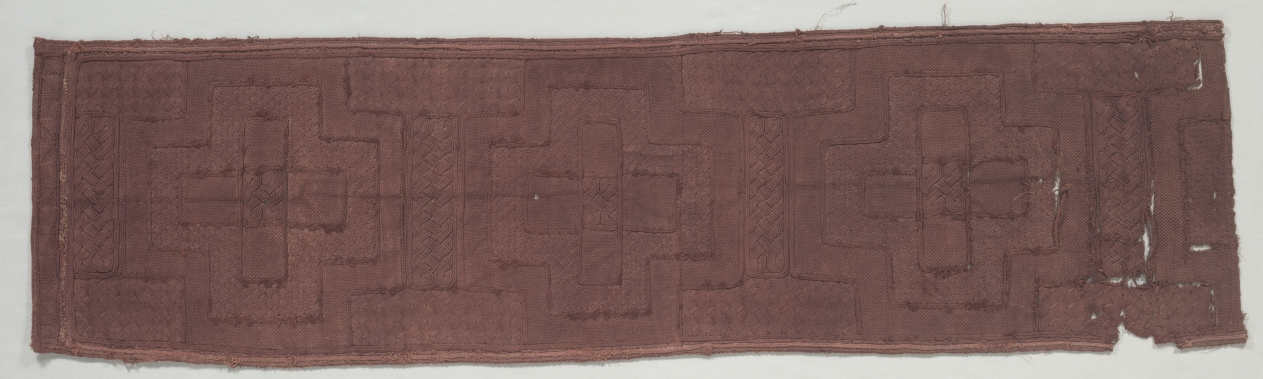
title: Fragment of Woman's overskirt (ncaka)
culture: Africa, Democratic Republic of the Congo, Kuba makers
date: late 1800s–early 1900s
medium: Raffia and tukula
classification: Garment